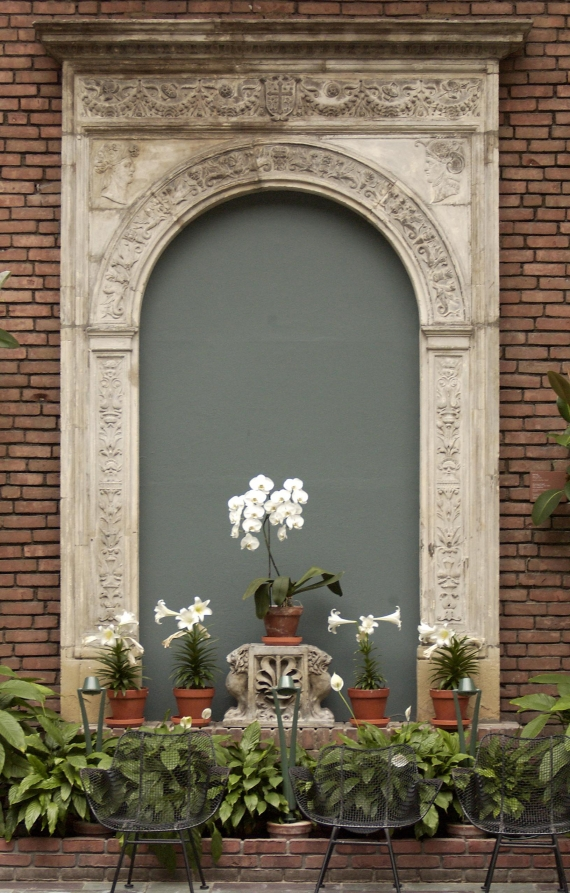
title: Doorway (Portal)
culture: Italy, Gubbio (?), 15th century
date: late 1400s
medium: gray sandstone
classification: Sculpture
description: This doorway may have been a part of Federico da Montefeltro's Ducal Palace in Gubbio, Italy, built in 1470 by Luciano Laurana and possibly finished by Francesco di Giorgio Martini. A Ducal studiolo decorated with wooden panels is in the Metropolitan Museum in New York. Because of the differences in ornamentation between the doorways in the Met's Ducal studiolo and this doorway, it is not certain that this doorway is from Gubbio's Ducal Palace. The arch of the doorway is decorated with masks, urns, and elaborate garlands. From the upper corners of the doorway, two profile heads face